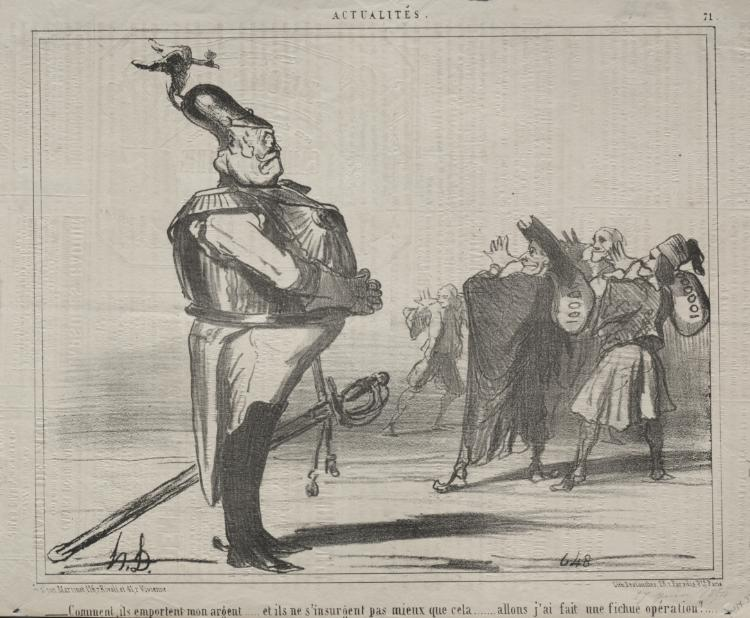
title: Why are they taking away my money...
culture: France, 19th century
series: News of the Day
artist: Honoré Daumier (French, 1808–1879)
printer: Destouches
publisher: Mon. Martinet, r. Rivoli, et 41 r. Vivienne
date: 1854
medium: lithograph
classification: Print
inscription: Lower right corner, pencil: 17 juin 1854 / 47.324 / D.vii.2518-II/II ; Lower margin, printed: Maison Martinet, 116 r. Rivoli et 41, r. Vivienne / Lith. Destouches, 28, r. Paradis Pre. Paris.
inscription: Above image, printed: ACTUALITÉS. / 71 ; Below image, printed: - Comment, ils emportent mon argent..... et ils ne s'insurgent pas mieux que cela....... allons j'ai fait une fichue opératiou!....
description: This print was published in Le Charivari (June 17, 1854) as plate 71 from the series News of the Day.